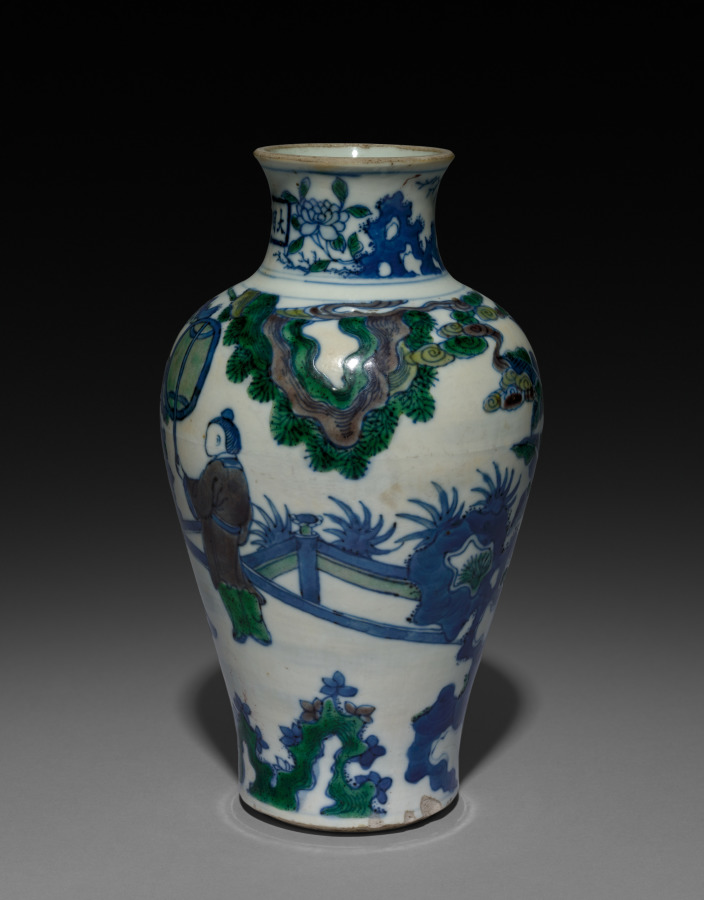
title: Vase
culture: China, Jiangxi province, Jingdezhen kilns, Ming dynasty (1368-1644), Wanli reign (1572-1620)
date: 1573–1620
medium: porcelain with underglaze blue decoration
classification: Ceramic